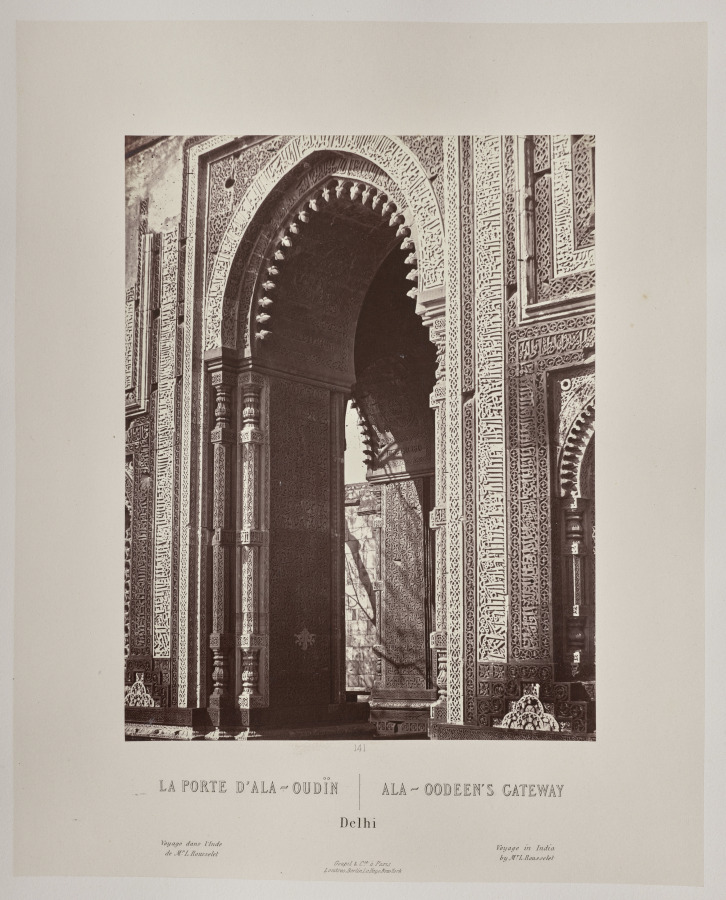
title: Ala-Oodeen's Gateway, Delhi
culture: France, 19th century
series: India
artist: Louis-Théophile Marie Rousselet (French, 1845–1929)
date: 1865–68, published 1869–70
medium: Albumen print from glass plate negative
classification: Photograph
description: Concerned that his drawings did not do justice to the splendor of India’s monuments, Rousselet learned photography in India that year, a remarkable accomplishment. He proved to be a talented photographer with a sophisticated sense of composition. The scenes in this volume sweep across sites of Sultanate, Rajput, and Mughal power in northern India, from the sacred Hindu city of Varanasi on the Ganges River to Alwar in Rajasthan. Also included are several scenes of industry and portraits of Indian rulers.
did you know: Louis Rousselet described himself as a “scientific traveler” when he went to India alone at age 18 in 1863 and stayed into 1868.